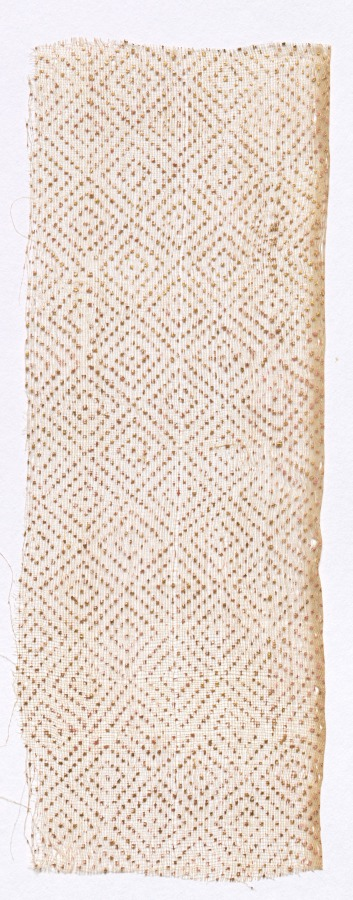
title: Fragment of Draped Court Apparel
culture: India, Rajasthan ?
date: 1800s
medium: Block printed with gold leaf (varak) on undyed plain weave cotton muslin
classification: Textile